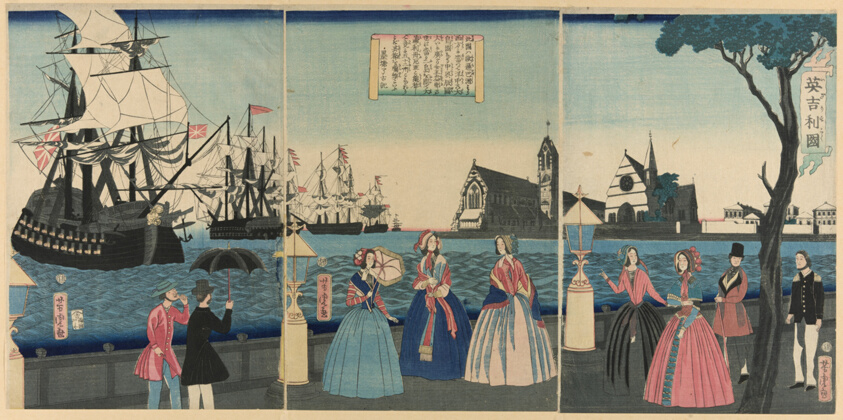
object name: Print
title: England (Igirisu koku)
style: Japanese (culture or style)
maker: Utagawa Yoshitora (Japanese, active c. 1836-87)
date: 1865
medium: Color woodblock print; oban triptych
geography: Japan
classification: woodblock print; print; asian art